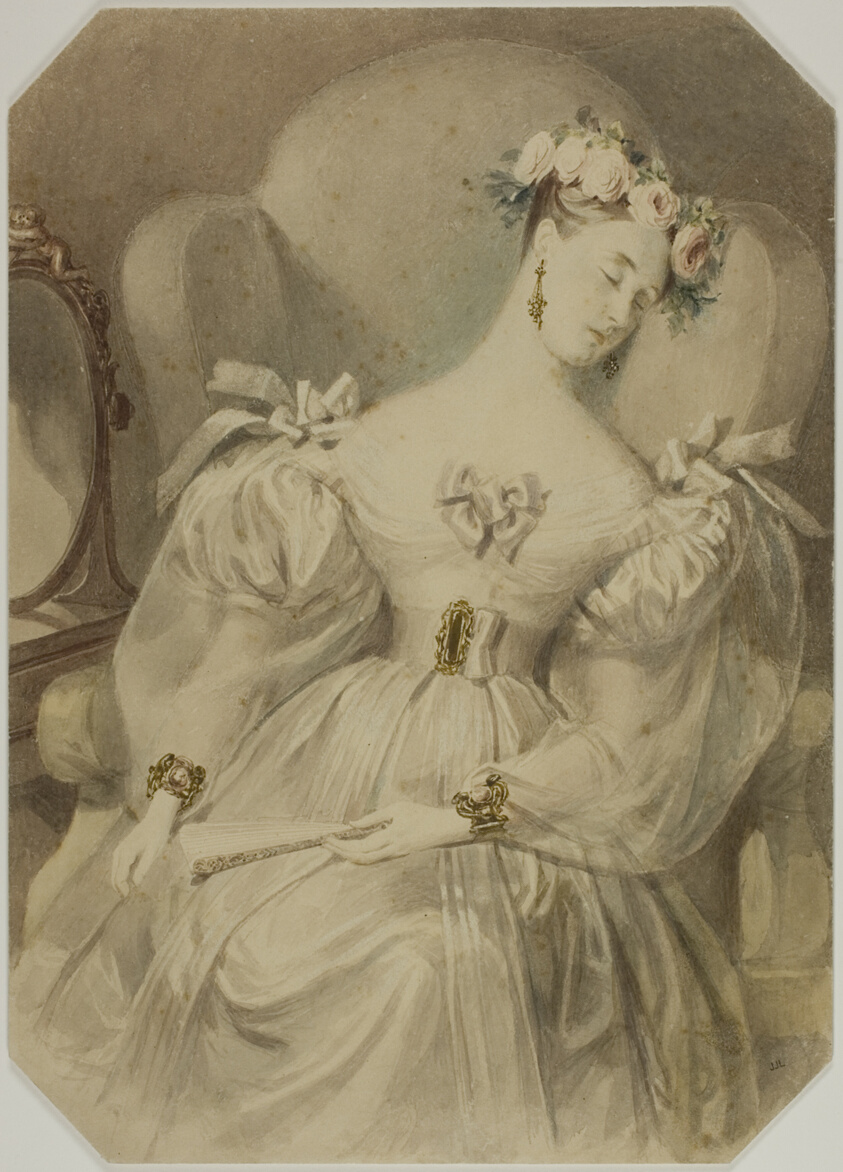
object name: Drawing and Watercolor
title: Woman in Evening Dress Asleep in Armchair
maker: Attributed to Alfred Edward Chalon; English, born Switzerland, 1780-1860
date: c. 1840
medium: Watercolor with scraping, over graphite, on cream board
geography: England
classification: watercolor; drawings (visual works); prints and drawing